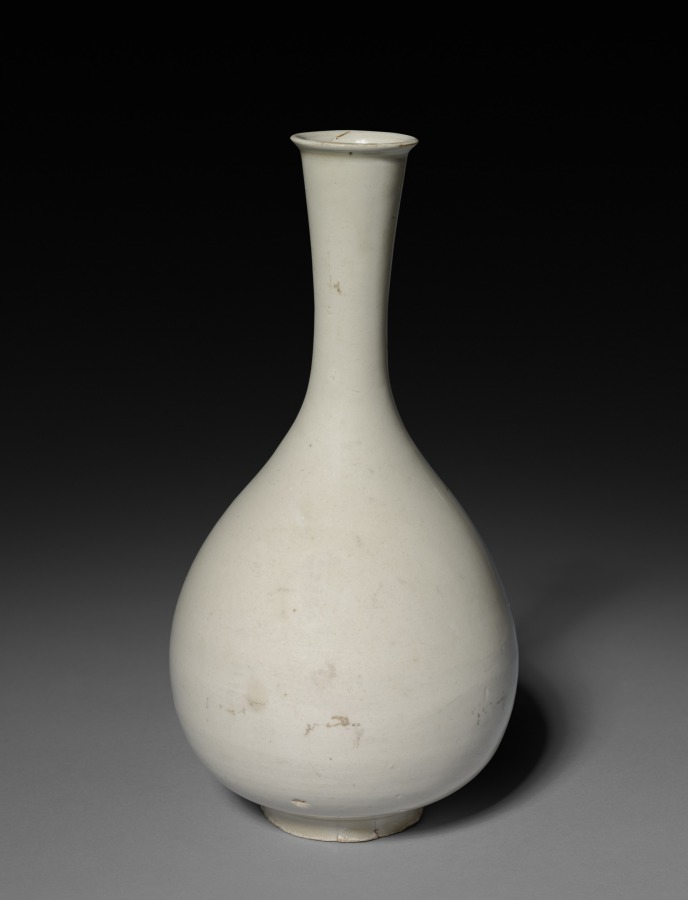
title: Bottle Vase: Ding ware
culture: China, Jin dynasty (1115-1234)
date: 12th Century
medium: glazed white porcelain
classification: Ceramic